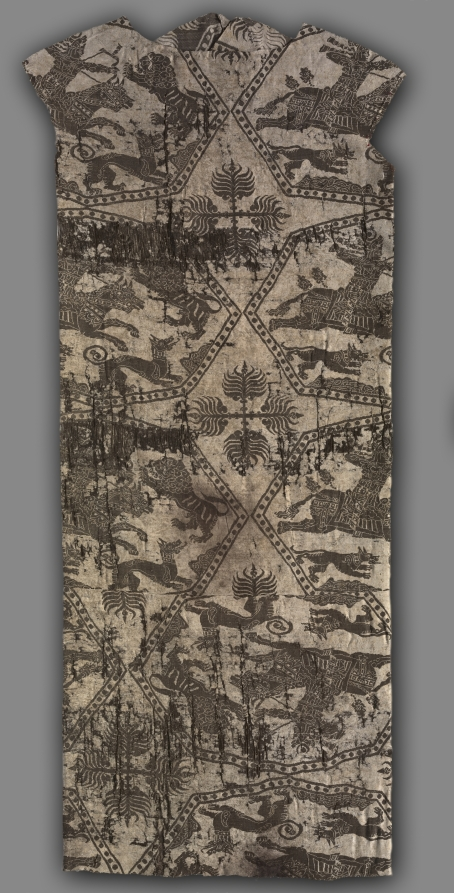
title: Fragment of a Caftan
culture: Iraq or Iran, in the style of the Buyid period (945–1055)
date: before 1982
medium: Silk: lampas weave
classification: Textile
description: This fragment from a caftan features large-scale flattened octagons with pearled borders that contain a royal hunting scene: a king mounted on a running horse draws his bow at a rampant lion. Two dogs with their tongues out also run towards the lion. The star-shaped interspaces are filled with four radiating palmettes.